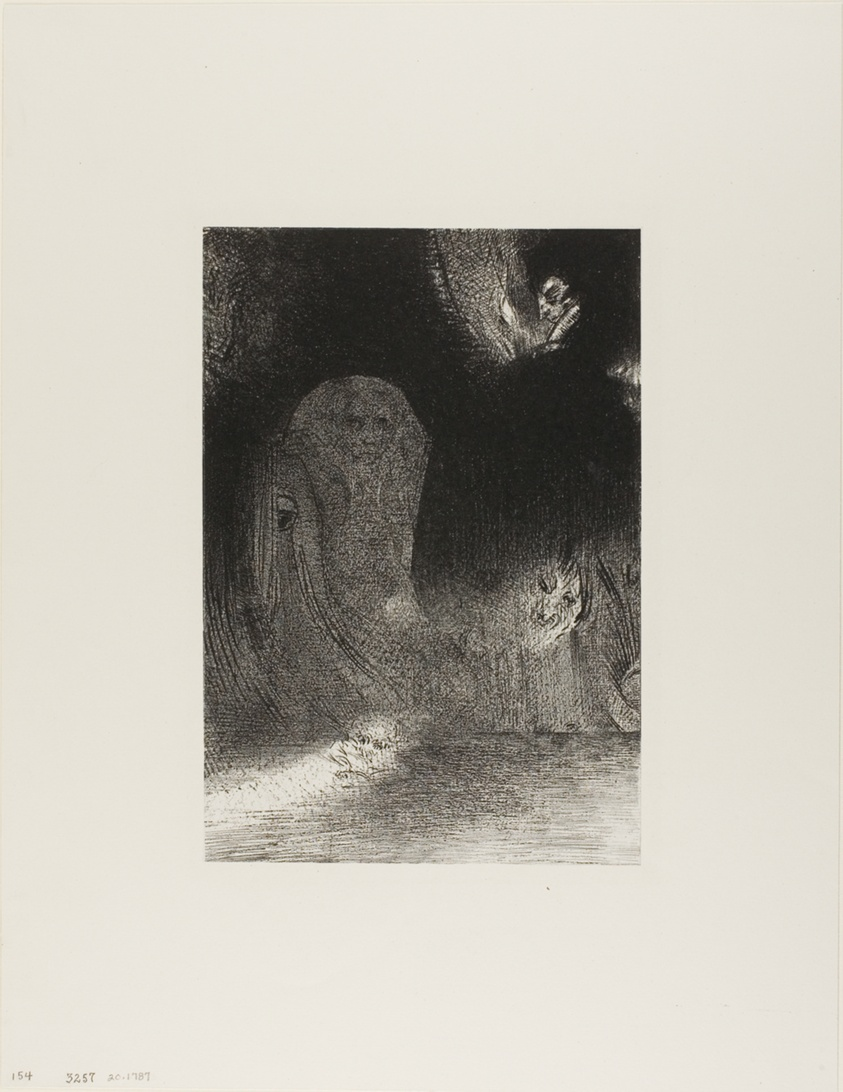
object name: Print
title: I Have Sometimes Seen in the Sky What Seemed Like Forms of Spirits, plate 21 of 24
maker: Odilon Redon (French, 1840-1916)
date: 1896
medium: Lithograph in black on ivory China paper laid down on ivory wove paper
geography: France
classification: lithograph; print; prints and drawing; paper